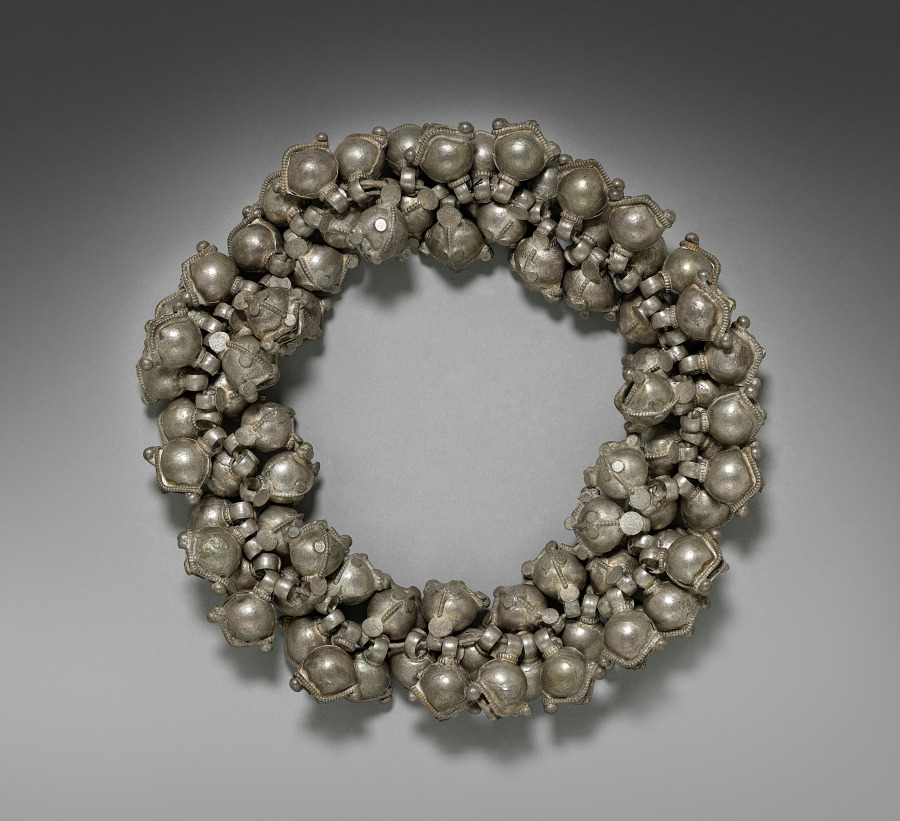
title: Necklace in the Form of Bells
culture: India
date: early 1900s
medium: silver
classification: Jewelry